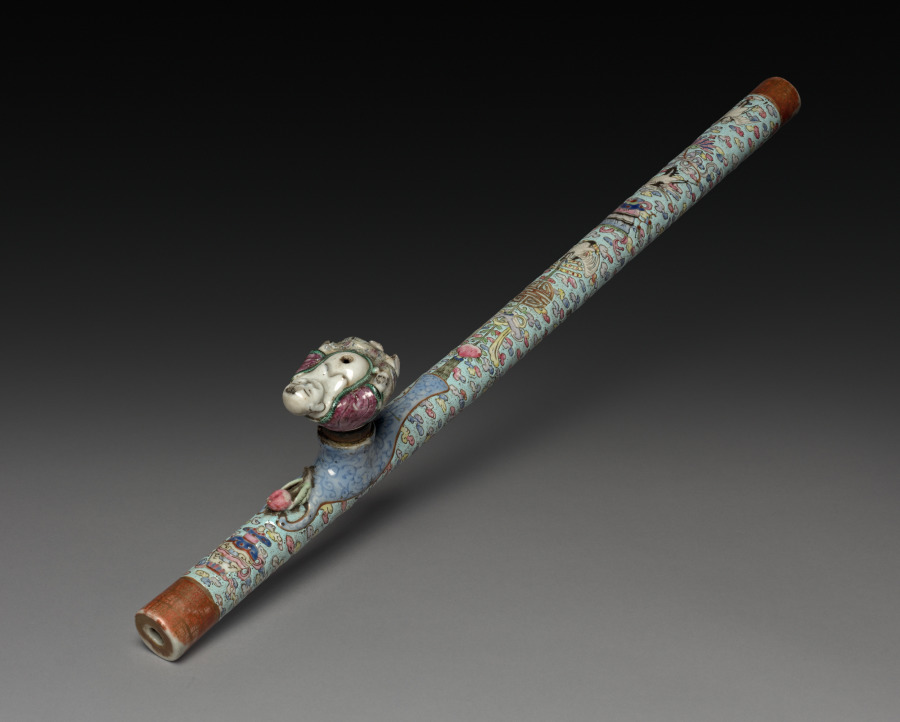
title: Opium Pipe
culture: China, Qing dynasty (1644-1911)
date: 1800s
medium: enamel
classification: Miscellaneous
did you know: The stem of the pipe is decorated with symbols of longevity, while the porcelain bowl is in the shape of a Buddha.